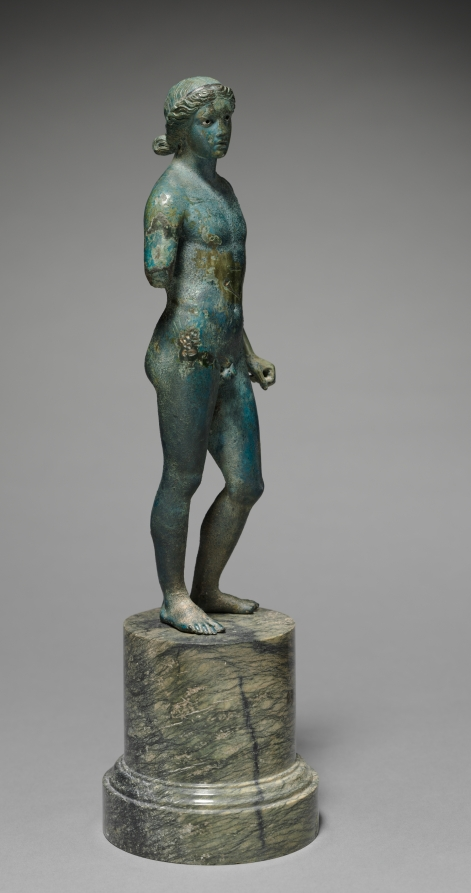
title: Athlete or Apollo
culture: Greece, Macedonia(?)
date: probably 100–1 BCE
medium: bronze with silver inlays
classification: Sculpture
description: This bronze statuette depicts a nude male, perhaps a young athlete or the youthful god Apollo. The figure is made from solid bronze, with a fillet of inlaid silver on his head. The figure’s right arm is broken off just above the elbow. If this is a statue of Apollo, he may have once held a bow and arrow; if it depicts an athlete, he could have held athletic equipment, a symbol of victory, or an offering dish.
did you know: The eyes of this figure are decorated with inlaid silver.